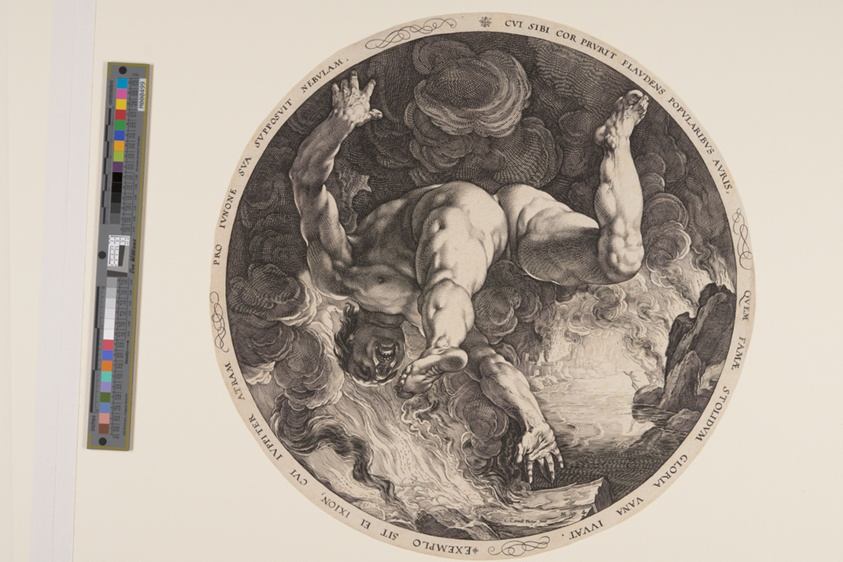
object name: Print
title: Ixion, from The Four Disgracers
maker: Hendrick Goltzius (Dutch, 1558–1617); after Cornelis van Haarlem (Dutch, 1562–1638)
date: 1588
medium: Engraving on ivory laid paper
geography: Netherlands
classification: print; paper; prints and drawing; engraving